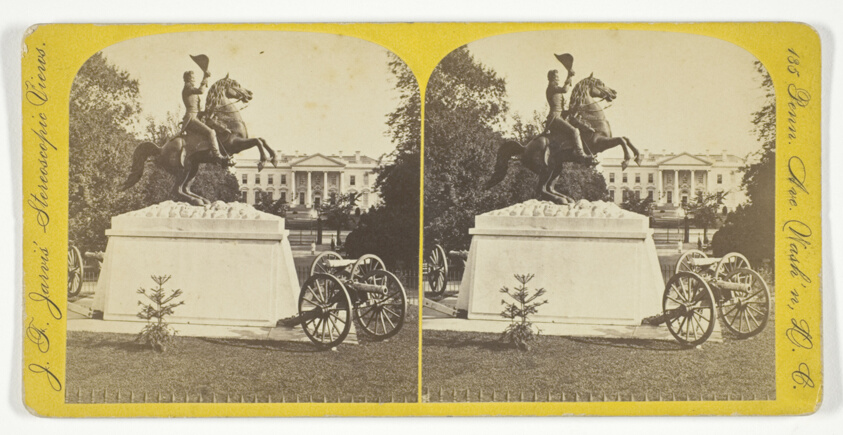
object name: Photograph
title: The Colossal Bronze Equestrian Statue of Gen. Andrew Jackson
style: 19th century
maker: J. F. Jarvis (American, 1850-1931)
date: 1875/99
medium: Albumen print, stereo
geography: District of Columbia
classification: photography; photograph; albumen silver print; stereograph (albumen)